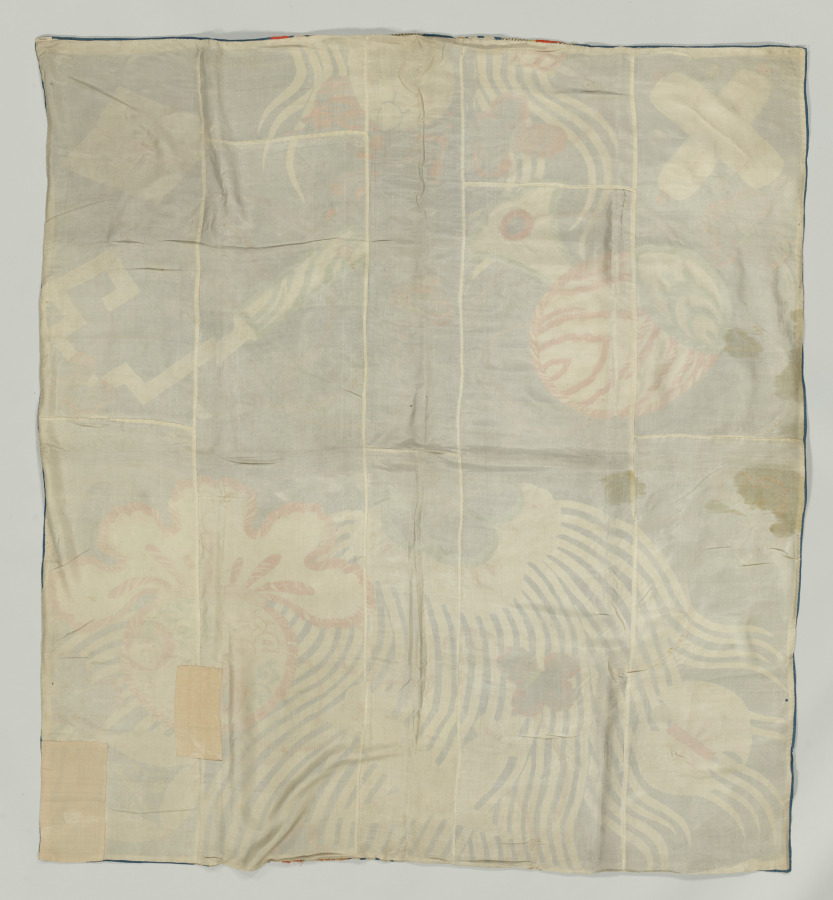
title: Embroidered Silk Square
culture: Japan, Genroku Style (1680-1720)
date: 1680–1720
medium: silk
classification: Embroidery